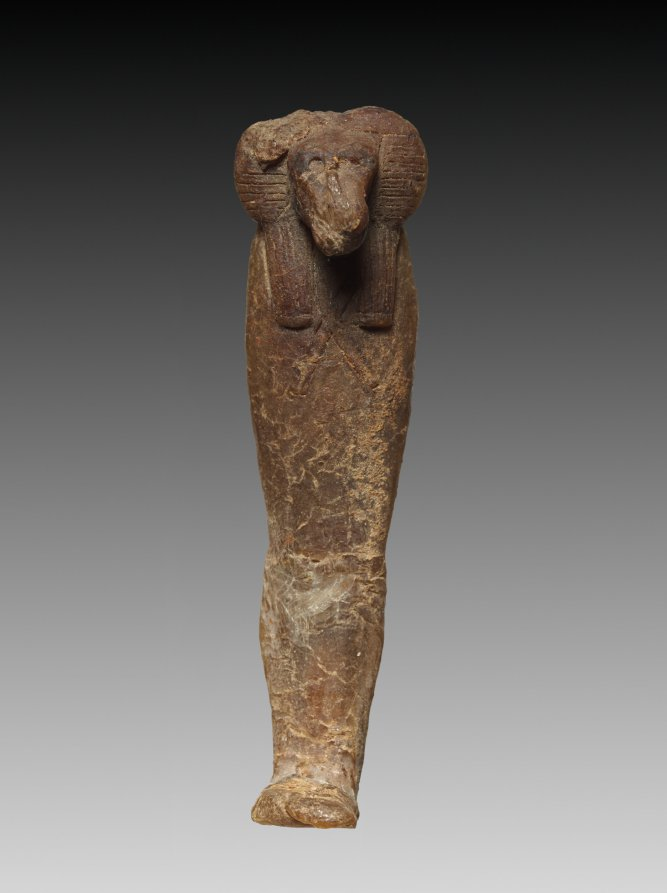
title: Son of Horus: Hapy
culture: Egypt, Third Intermediate (1069–715 BCE), Dynasties 21–22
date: 1000–900 BCE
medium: wax with dark amber varnish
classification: Funerary Equipment